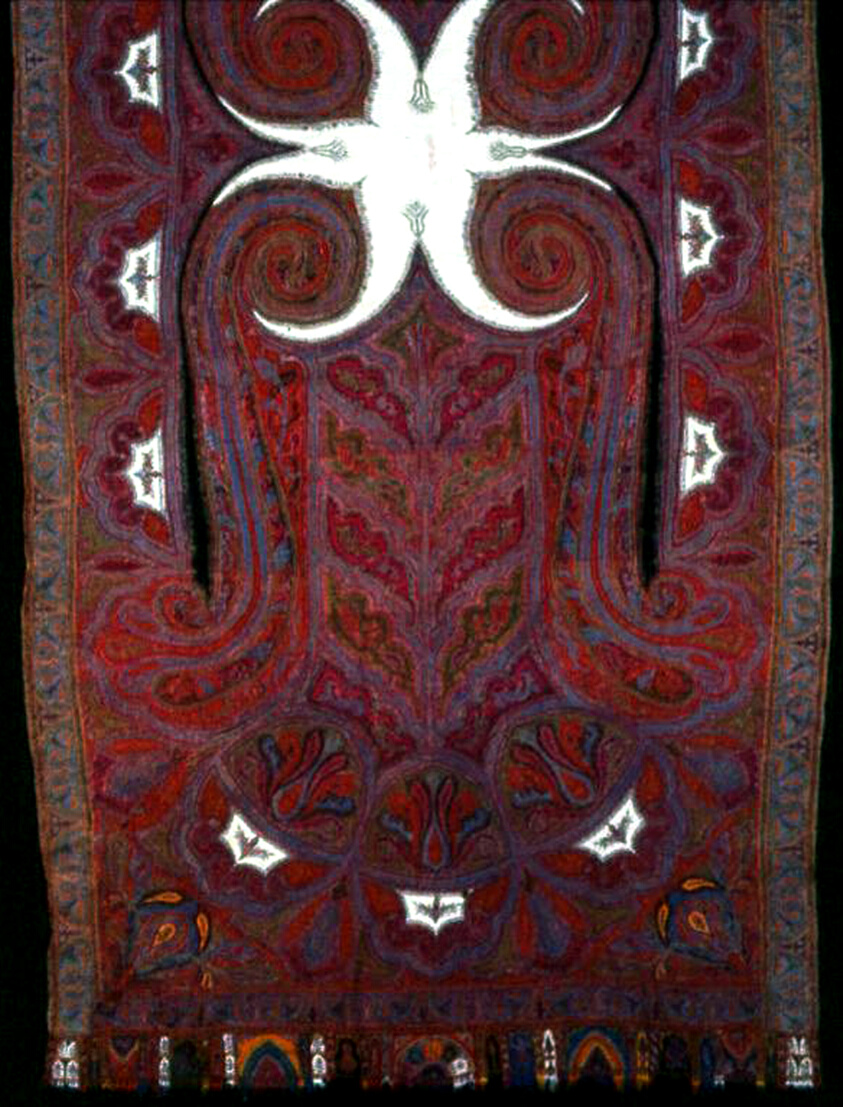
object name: Textile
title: Long Shawl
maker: India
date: 1855/65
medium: Wool, patchwork of double interlocking 2:2 'S' twill tapestry weaves; center of 2:2 'S' twill weave; embroidered in satin, surface satin, and stem stitches; "Harlequin" tabs of pieced 2:2 twill weaves; embroidered in flat, satin, surface satin, and stem stitches; laid work and couching; warp fringe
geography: India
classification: textile; weaving; needlework (visual works)